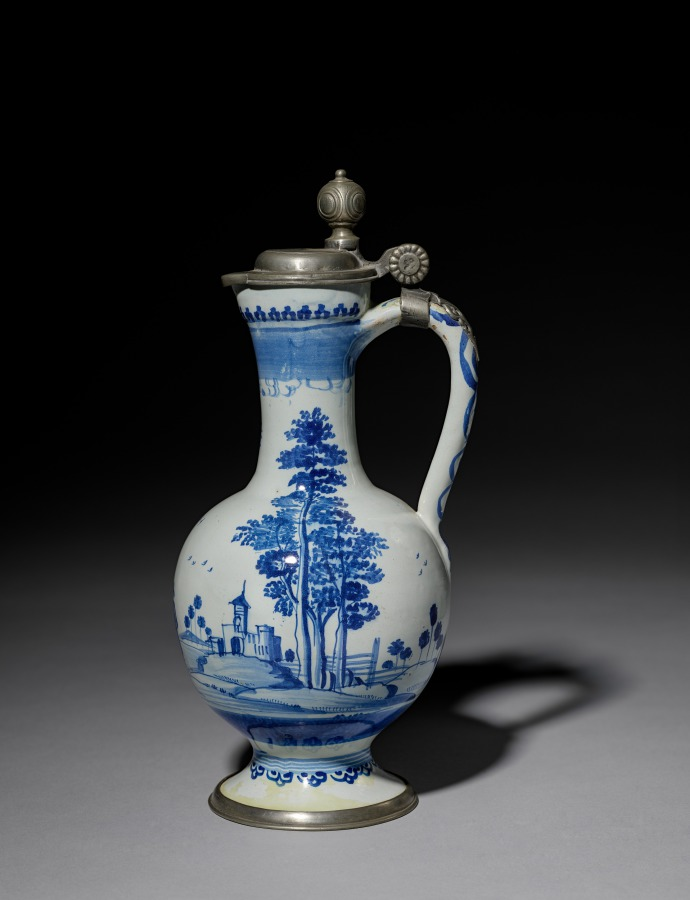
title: Covered Jug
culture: Germany, Bayreuth(?), 18th century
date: 1750–75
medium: earthenware decorated in underglaze blue with pewter mounts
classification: Ceramic